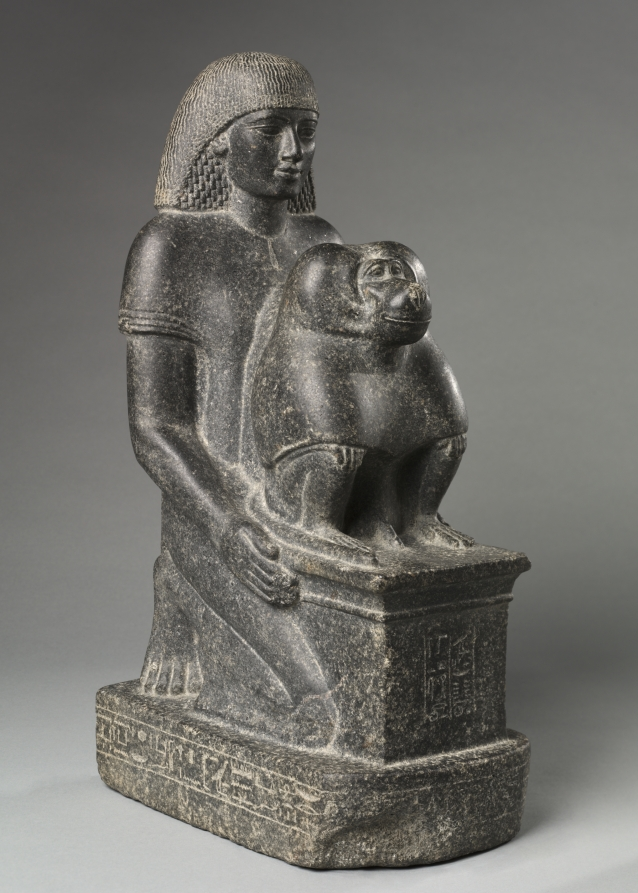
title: Statue of Minemheb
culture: Egypt, New Kingdom (1540–1069 BCE), Dynasty 18, reign of Amenhotep III (1390–1352 BCE)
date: c. 1391–1353 BCE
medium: granodiorite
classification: Sculpture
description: Minemheb was one of the many court officials who helped prepare for Amenhotep III's 30-year jubilee festival. Clearly, Minemheb regarded this as the high point of his career, since his title as chief of construction for the jubilee temple is the primary one provided on this statue. It is actually a statue within a statue: Minemheb kneels to present a small altar, upon which squats a statue of the god Thoth in baboon form. Carved in extremely hard stone, Minemheb's statue is nonetheless carefully detailed and superbly modeled. Special attention was given to the rendering of the baboon's face. The heavy-lidded eyes and furrowed brow give the animal an almost contemplative expression.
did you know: The baboon in this sculpture is the god Thoth in one of his animal forms.